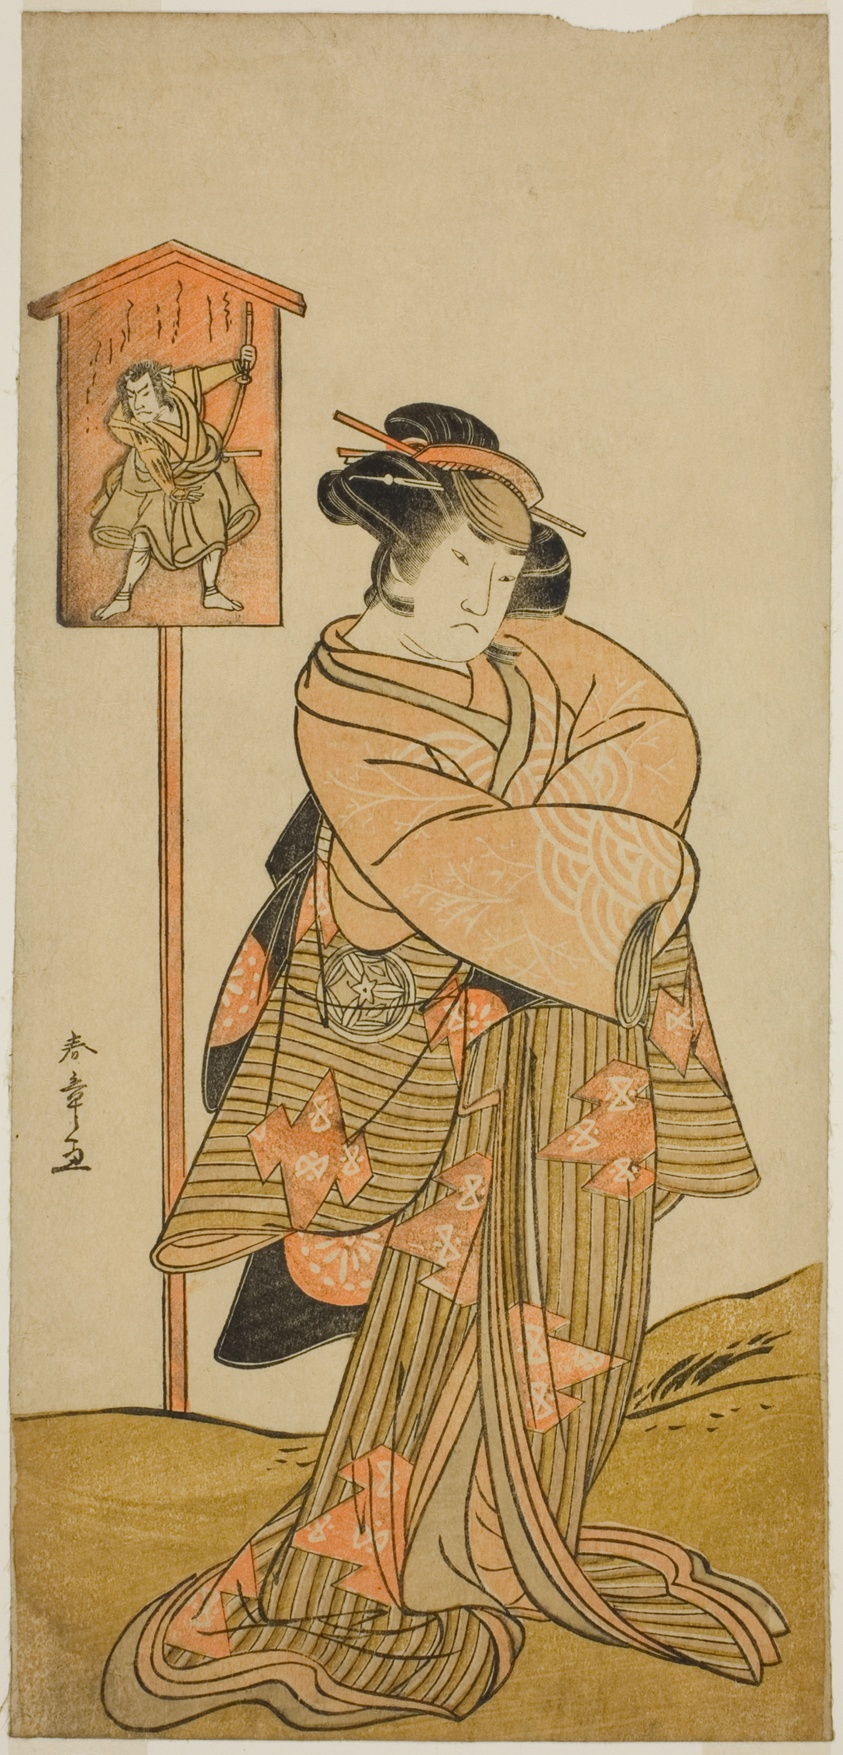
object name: Print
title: The Actor Yamashita Kinsaku II as Lady Manko (Manko Gozen) (?) in the Play Hatsumombi Kuruwa Soga (?), Performed at the Nakamura Theater (?) in the First Month, 1780 (?)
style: Japanese (culture or style)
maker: Katsukawa Shunsho 勝川 春章; Japanese, 1726-1792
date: c. 1780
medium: Color woodblock print; hosoban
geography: Japan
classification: woodblock print; print; asian art